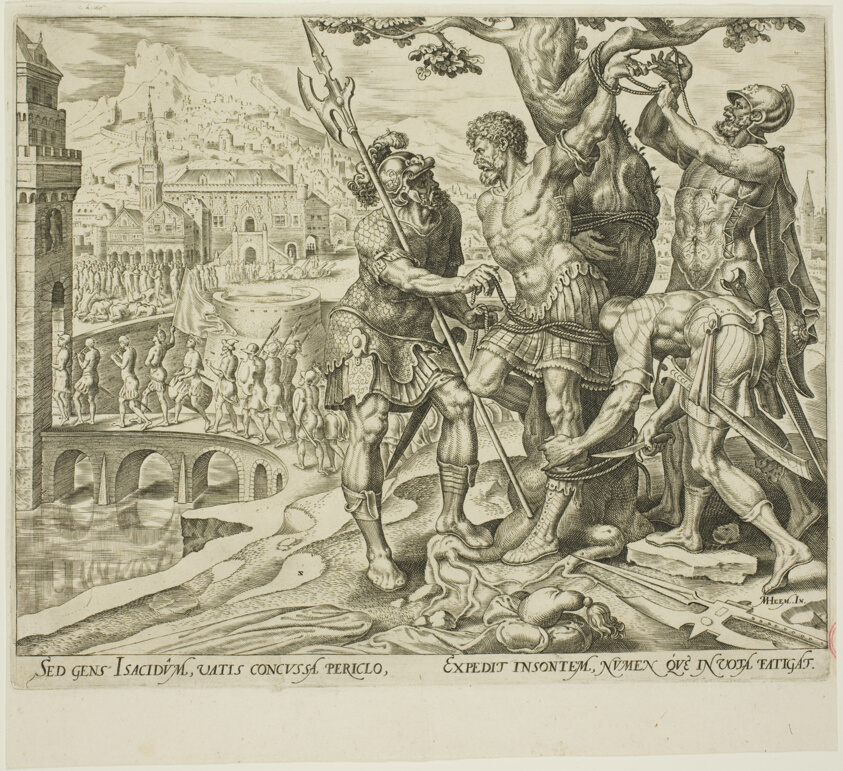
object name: Print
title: The Israelites Finding Achior Tied to a Tree, plate two from The Story of Judith and Holofernes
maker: Philip Galle (Netherlandish, 1537-1612); after Maarten van Heemskerck (Dutch, 1498-1574)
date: 1564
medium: Engraving in black on ivory laid paper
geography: Netherlands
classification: engraving; paper; print; prints and drawing